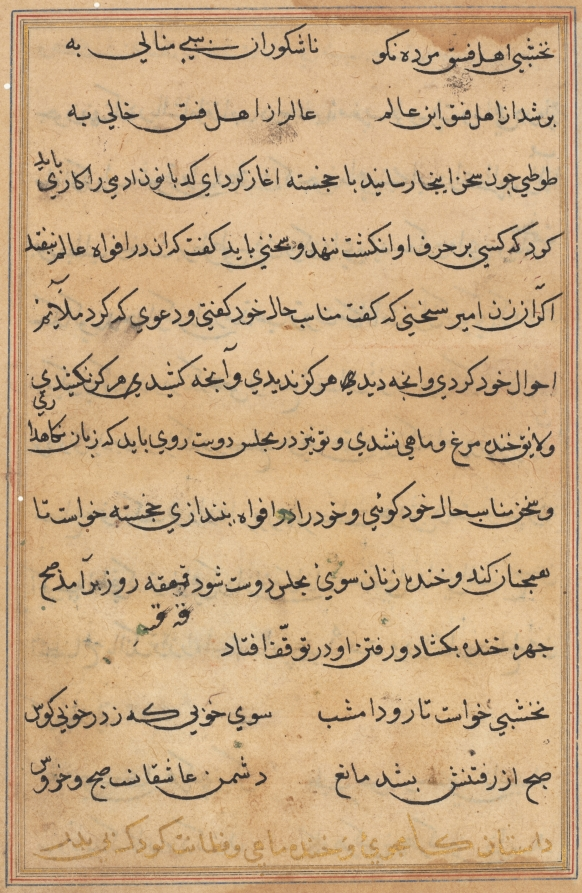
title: Page from Tales of a Parrot (Tuti-nama): text page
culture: Mughal India, court of Akbar (reigned 1556–1605)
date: c. 1560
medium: gum tempera, ink, and gold on paper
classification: Painting